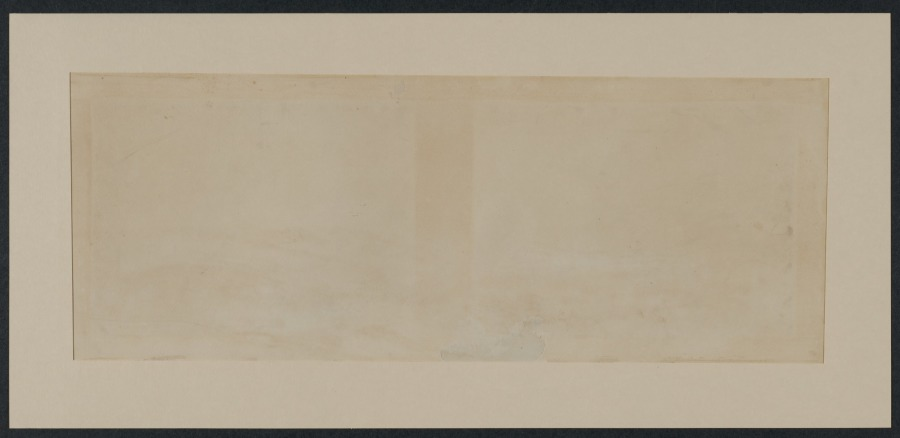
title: The Valley of the Tyne, My Native Country near Henshaw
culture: England, 19th century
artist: John Martin (British, 1789–1854)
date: 1842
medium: watercolor, gouache and gum arabic with graphite underdrawing, sanding, and scraping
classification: Drawing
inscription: signed, lower right, in watercolor: J. Martin / 1842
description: Panoramic landscapes in watercolor became an important source of income during John Martin’s late career. This work demonstrates his ability to convey monumentality on a small scale and to combine broad washes of color with meticulous detail. The sweeping vista in this drawing describes the fertile valley of the River Tyne, known for its forests, flora, and fauna. Curving arcs of slopes and plains swirl around the composition. A tiny couple and dog rush through the vast landscape beneath ominous storm clouds.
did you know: The setting of this watercolor is John Martin's native Northumberland, to which he was deeply attached and described having spent time there "exulting in the sublime grandeur of the surrounding beauties of nature."